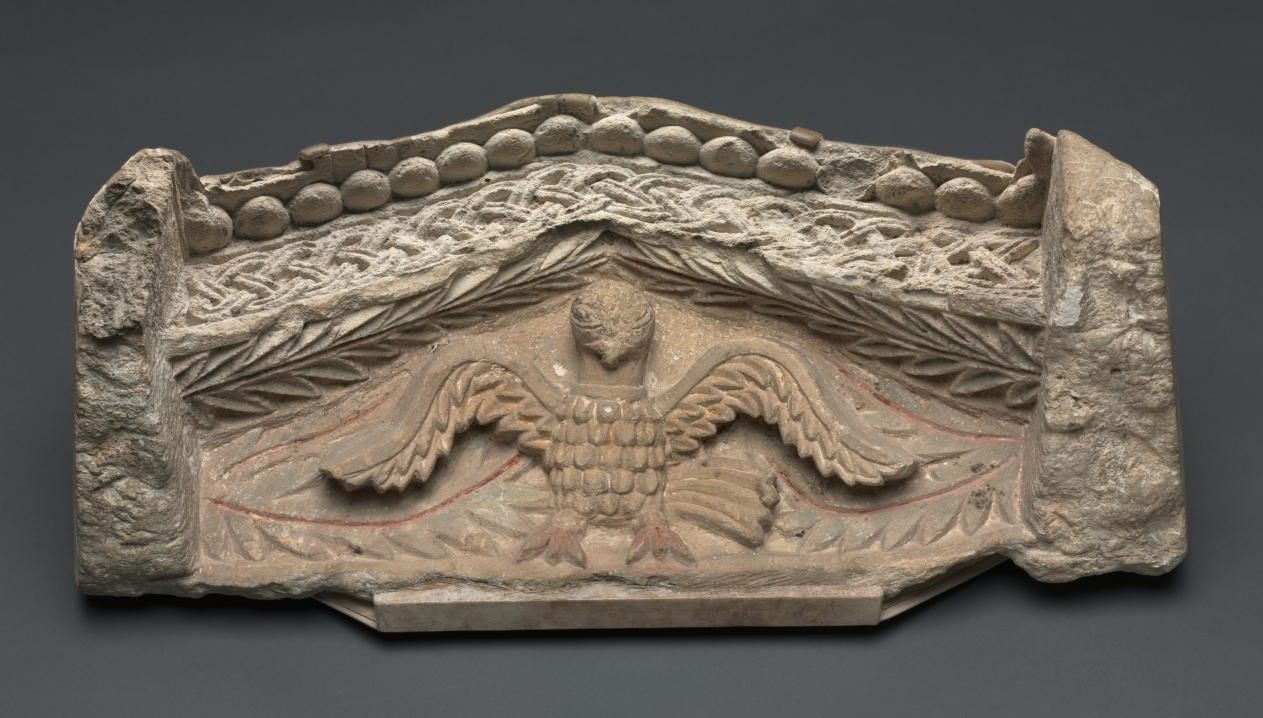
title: Pediment with an Eagle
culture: Egypt, Coptic period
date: 400s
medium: limestone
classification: Sculpture